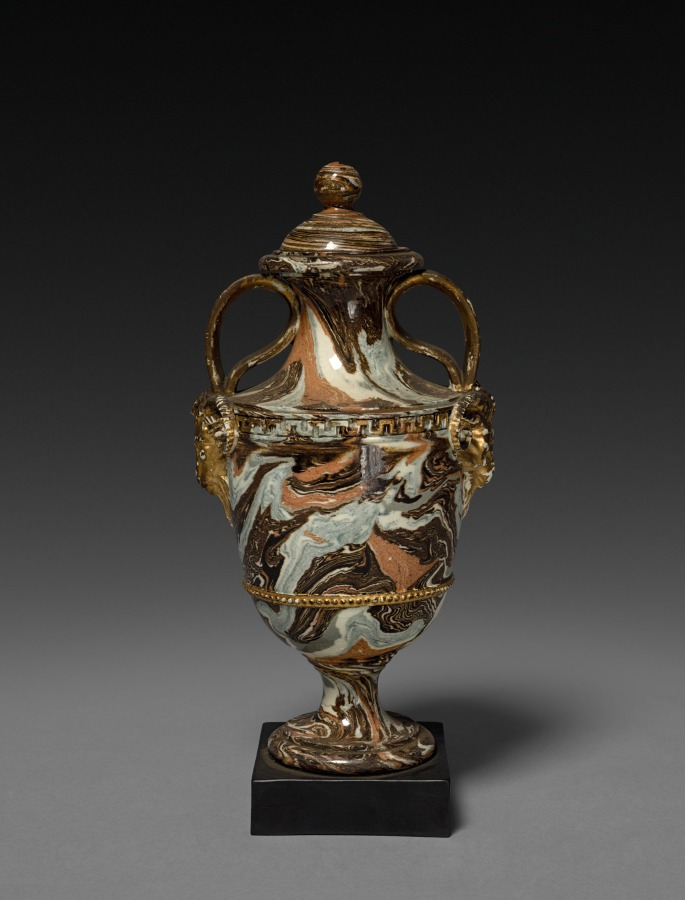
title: Urn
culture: England, late 18th or 19th century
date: late 1700s - 1800s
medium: earthenware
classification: Ceramic